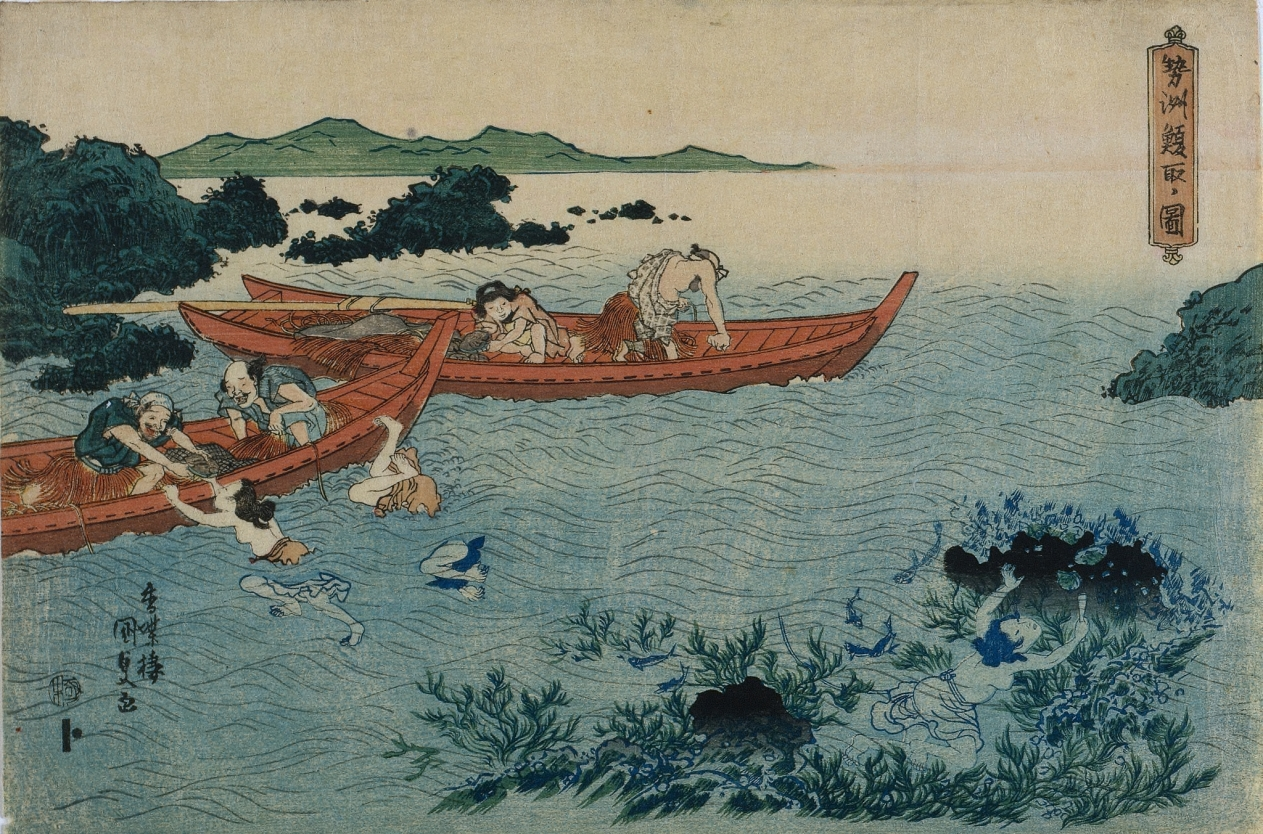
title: Abalone Divers off the Coast of Ise, from an Untitled Landscape Series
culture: Japan, Edo period (1615–1868)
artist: Utagawa Kunisada (Japanese, 1786–1865)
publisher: Yamaguchiya Tobei (Japanese)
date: early 1830s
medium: color woodblock print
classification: Print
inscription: 香蝶楼国貞画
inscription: Publisher: Yamaguchiya Tobe (emblem). Censorship Seal: kiwame 極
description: Prolific printmaker Utagawa Kunisada produced this seascape of abalone fishing as part of a series of untitled landscape prints in the early Tenpō era (1830–44). In the coastal city of Ise on Japan’s main island of Honshu, female divers called ama traditionally did the physically demanding job of harvesting shellfish such as abalone. These marine snails are valuable for their edible flesh, and their iridescent inner shell is a source of mother-of-pearl. This print depicts three stages of the harvest: One diver plunges into the water, another holds her breath while prying an abalone off the rocks with a blade, and a third ama conveys her successful harvest to the beaming fishermen on the boat.